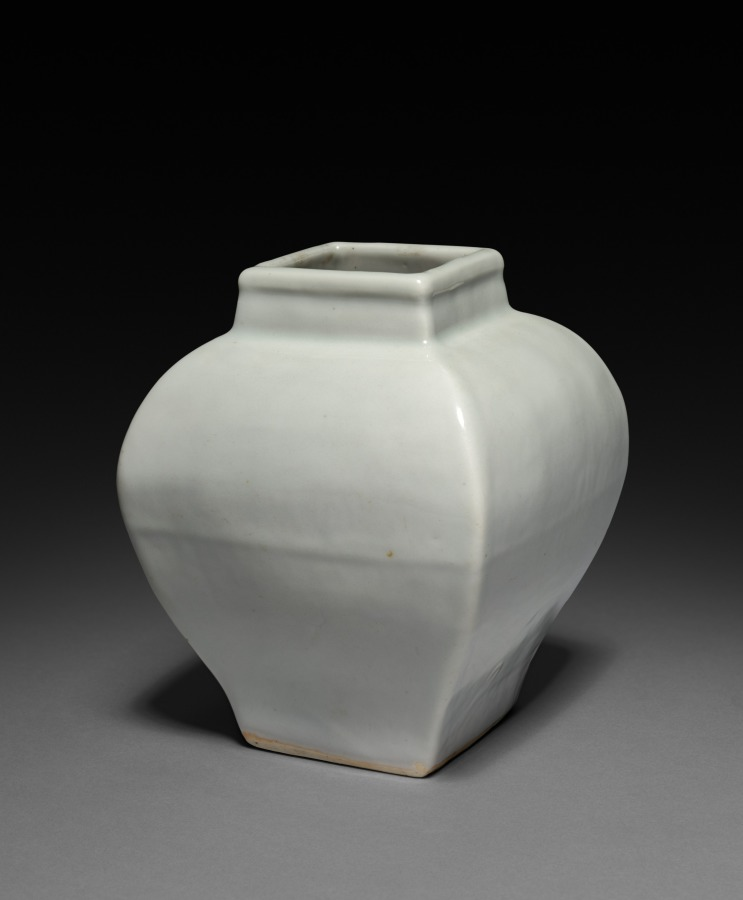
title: Square Jar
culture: China, Jiangxi province, Jingdezhen kilns, Ming dynasty (1368-1644), Jiajing mark and reign (1522-66)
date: 1522–66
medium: porcelain with white glaze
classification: Ceramic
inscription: 大明嘉靖年製